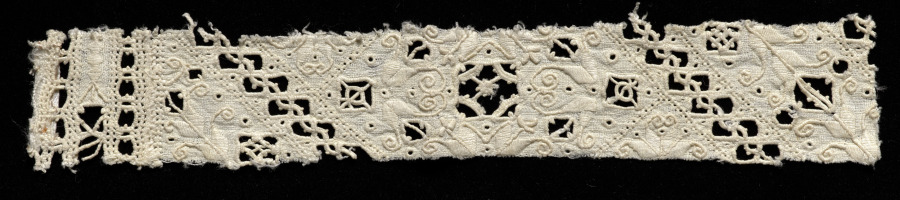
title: Lace Fragment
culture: Italy, 1600s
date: 1600s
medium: Linen: needle lace (cutwork)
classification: Lace